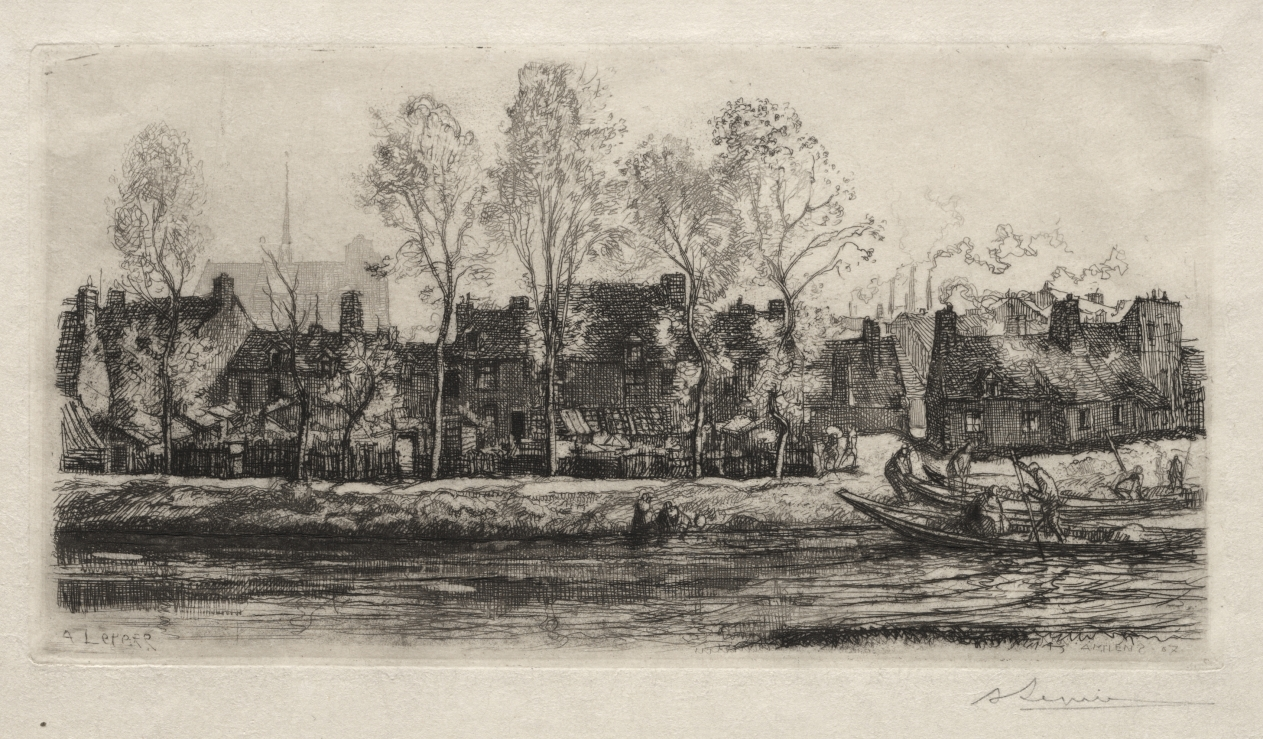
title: Amiens, the Banks of the Somme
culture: France, 19th-20th Century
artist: Auguste Louis Lepère (French, 1849–1918)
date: 1907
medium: etching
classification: Print